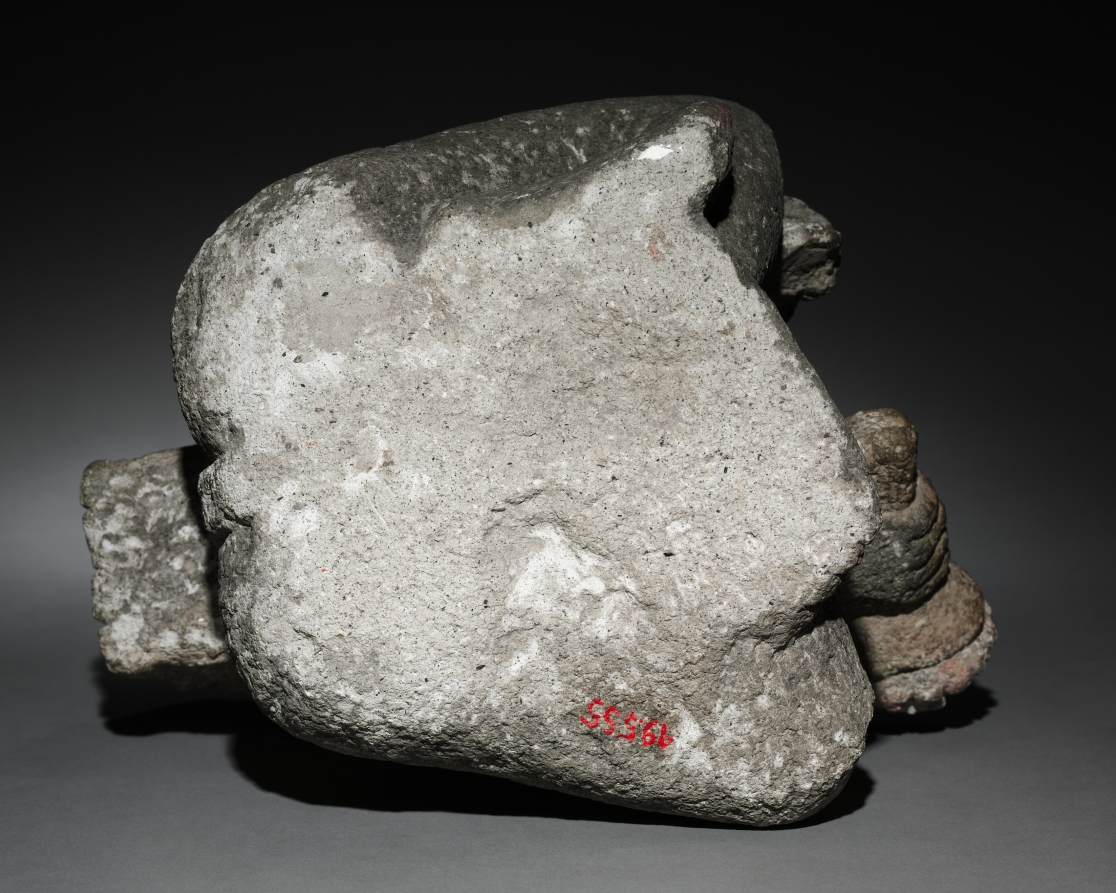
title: Seated Male Carrying Maize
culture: Central Mexico, Aztec style, 13th-16th century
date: 1325–1521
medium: stone, pigment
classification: Sculpture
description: This figure probably represents an Aztec deity-either Macuilxochitl or Xochipilli-whose domain was beauty, the arts, and such pleasures as gameplaying, dancing, and sex. Both names include the Aztec word for "flower," and in one hand the figure holds a cone of flowers, perhaps the blossoming crown of a cactus. For the Aztecs, flowers signified beauty, refinement, and fertility in general and sexuality in particular. The burden of maize cobs on his back also may allude to his creative energies.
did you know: Macuilxochitl is one of five gods of excess pleasure, and the punishment that follows.